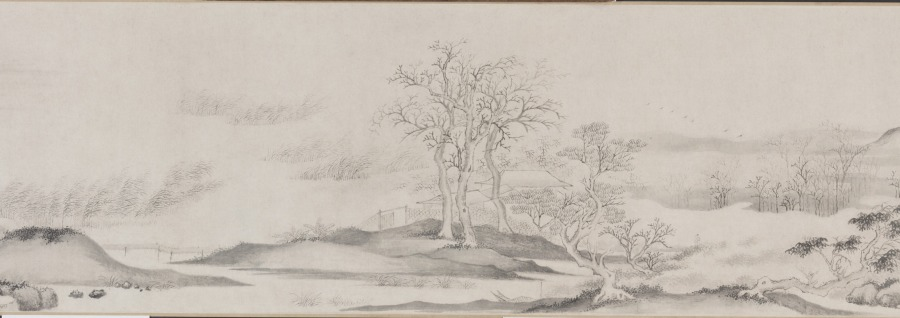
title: Water Village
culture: China, Ming dynasty (1368–1644)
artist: Wen Boren (Chinese, 1502–1575)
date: 1570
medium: handscroll; ink and light color on paper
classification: Painting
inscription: 隆慶庚午秋仿趙文敏筆. 五峰文伯仁 [印] 五峰山人; 文伯仁印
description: In the autumn of 1570, Wen Boren painted this seemingly unemotional scene of low-lying marshlands with a chain of rounded mountains in the background. A fishing boat is nestled on the shore near the village. Although paths and bridges traverse the landscape, only two people are visible in the stillness. From the restrained atmosphere of this landscape, one would never guess that Wen Boren was known as the “bad boy” of the Wu School for his explosive temper. As a younger man, he was even embroiled in a contentious lawsuit with his own uncle, Wen Zhengming (1470–1559), a master of Ming dynasty painting with whom he had trained. The ideal of the scholar-painter, or literati, was that an artist’s moral character is reflected in his paintings, so there was great incongruity between Wen Boren’s difficult personality and his restrained landscapes. A contemporary, Wang Shizhen, wrote this about him: "This gentleman is prone to behave odiously and screamed accusations at people. How is it possible for him to carry in his bosom such a wealth of scenic wonders?" Who knows what effort it took to subdue his fractious spirit to project an image of coolness and refined taste in his paintings?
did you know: A foreground tree has an eccentric twisting silhouette and pepper-dot "halo" of leaves.